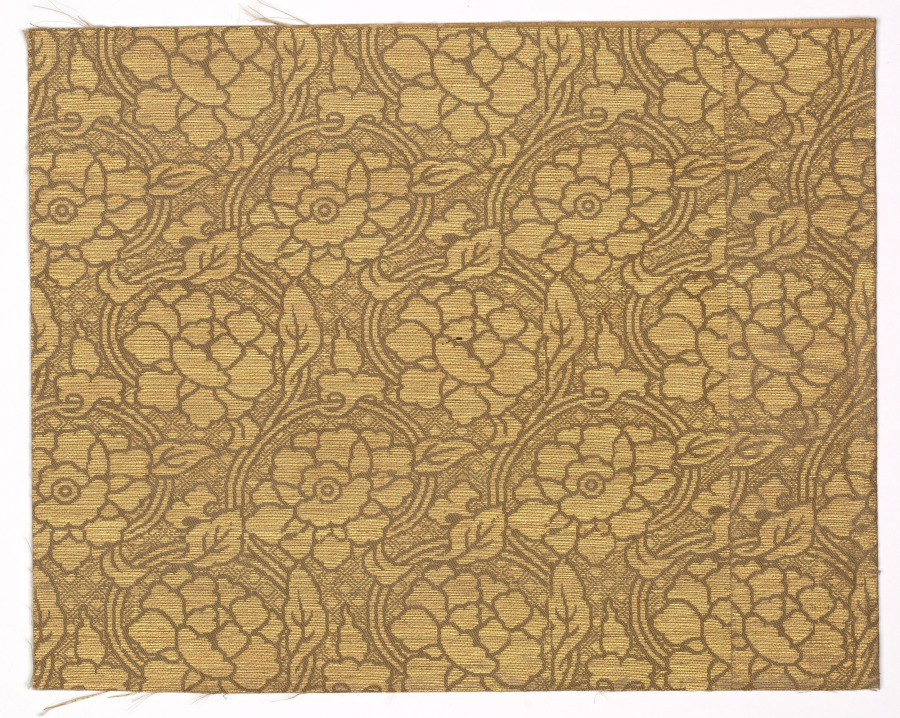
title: Textile Fragment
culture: Japan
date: 1800s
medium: silk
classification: Textile